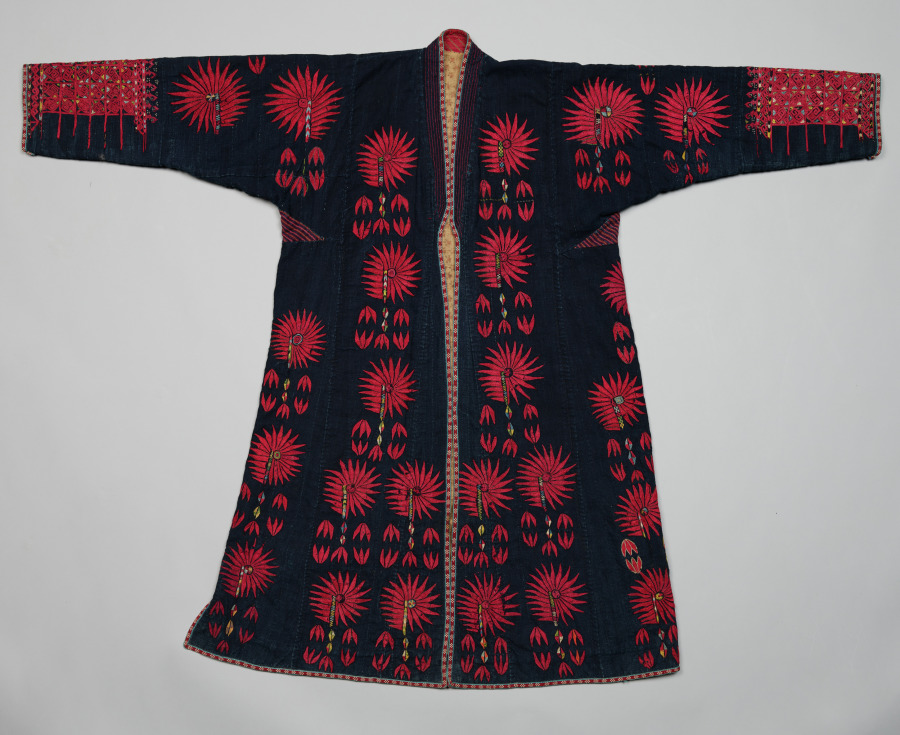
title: Woman's robe with crimson flora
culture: Uzbekistan, Karakapak Republic, Khorezm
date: late 1800s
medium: Plain weave: cotton (hand-spun, indigo dyed), embroidery: silk, cotton; tablet-woven (edges)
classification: Garment